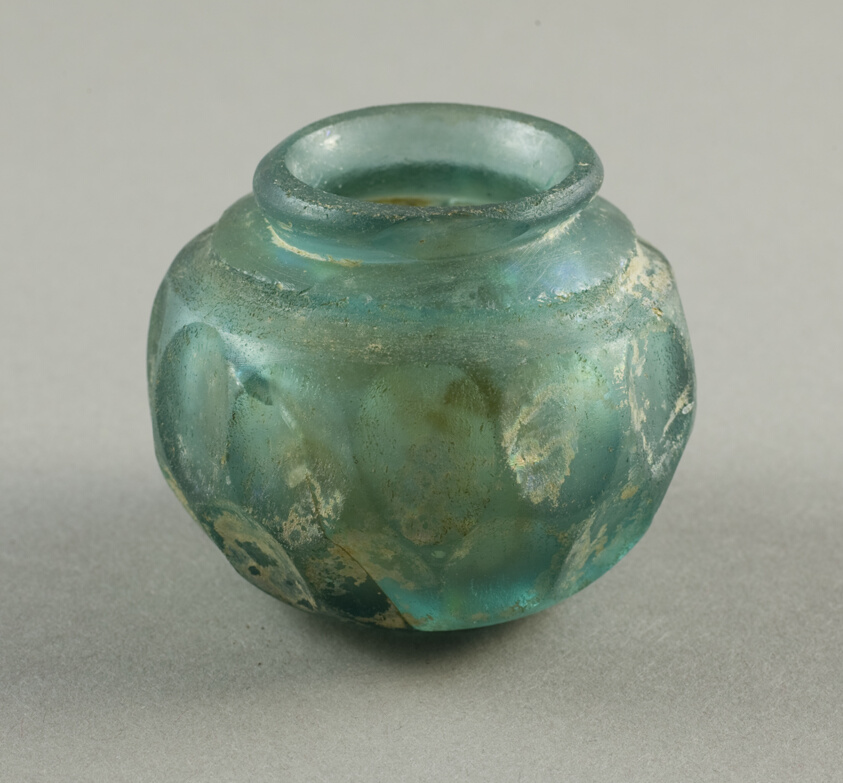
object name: Vessel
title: Jar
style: syrian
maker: Islamic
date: 7th-8th century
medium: Glass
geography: Syria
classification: glass; vessel; ancient art